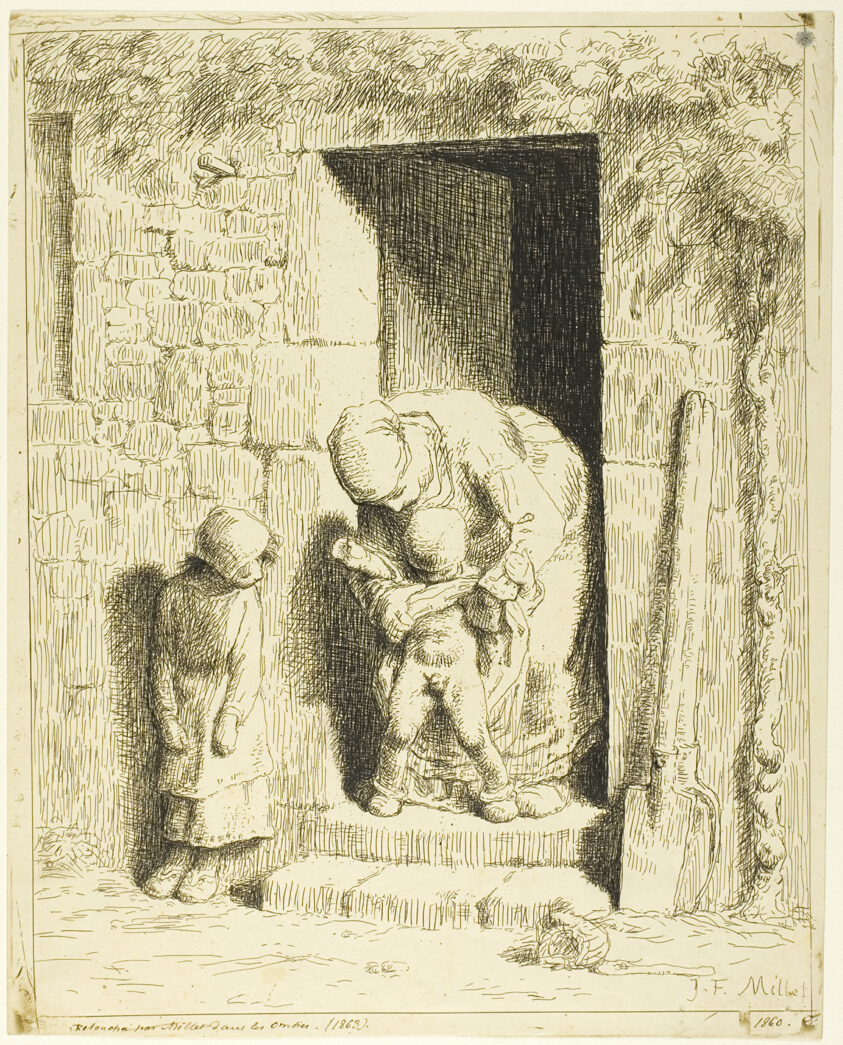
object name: Print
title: The Maternal Precaution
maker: Jean François Millet (French, 1814-1875)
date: 1860–63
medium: Cliché-verre retouched with dark brown ink on cream wove photo-sensitized paper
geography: France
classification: cliché-verre; print; prints and drawing